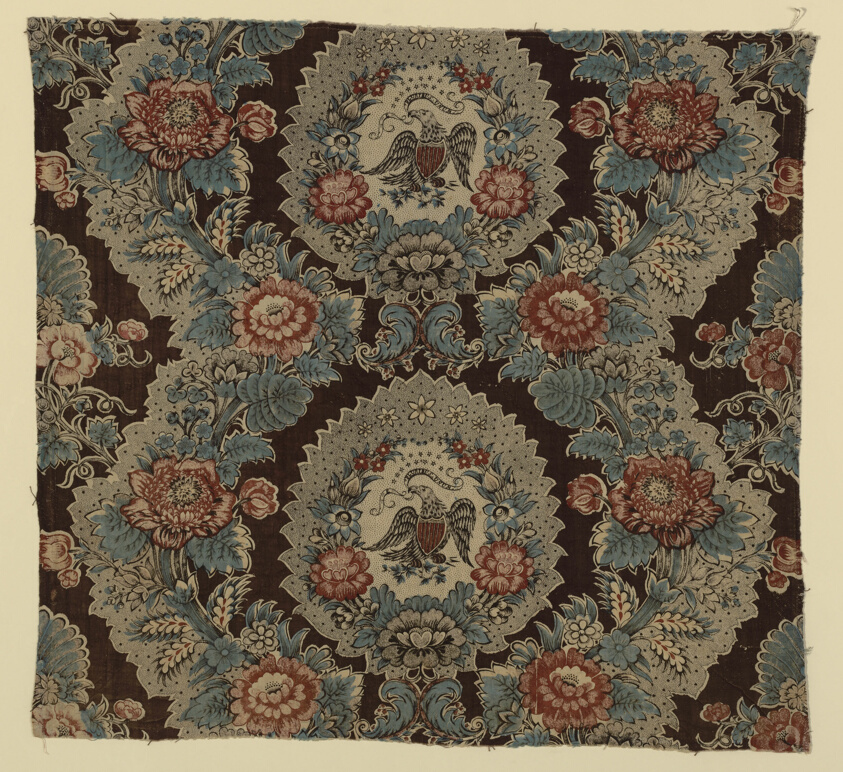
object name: Textile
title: E Pluribus Unum (From the Many, One) (Furnishing Fabric)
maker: England, Manchester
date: 1825/35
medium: Cotton, plain weave; engraved roller printed; glazed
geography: Manchester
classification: textile; weaving - printed; weaving; furnishing textile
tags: propaganda